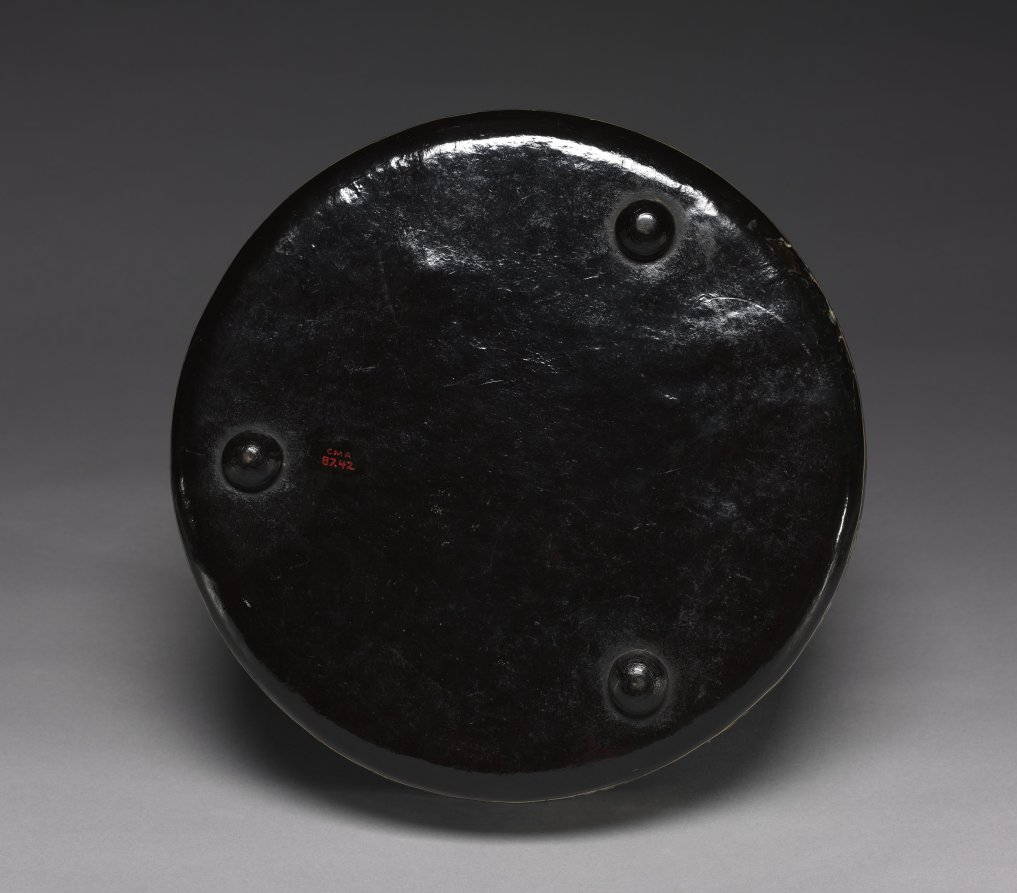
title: Tray for Sewing Tools with Mother-of-Pearl Inlay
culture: Korea, Joseon dynasty (1392–1910)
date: 1800s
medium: lacquer with mother-of-pearl inlay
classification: Lacquer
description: This mother-of-pearl lacquer tray is decorated with various scenes of animals interacting with their natural surroundings. Its flat circular base depicts a pond where a leaping carp and a small school of fish swim below the boughs of a cherry tree. The tray’s exterior wall is densely decorated with various animals paired with plants symbolizing wishful thoughts of longevity, marital happiness, and prosperity.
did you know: Many thin layers of lacquer were applied to the tray's leather core. The design was cut into the dry lacquer and then the mother-of-pearl was inserted.